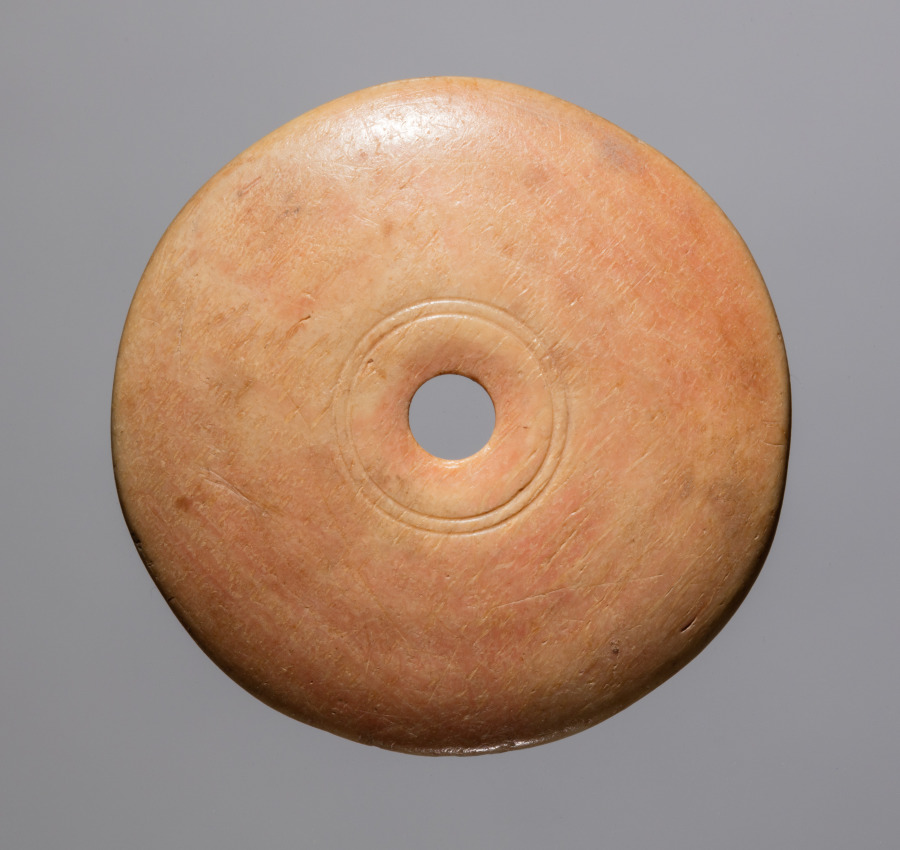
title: Spindle Whorl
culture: Iran, early Islamic period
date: 700s - 900s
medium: bone, incised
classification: Spindle Whorl